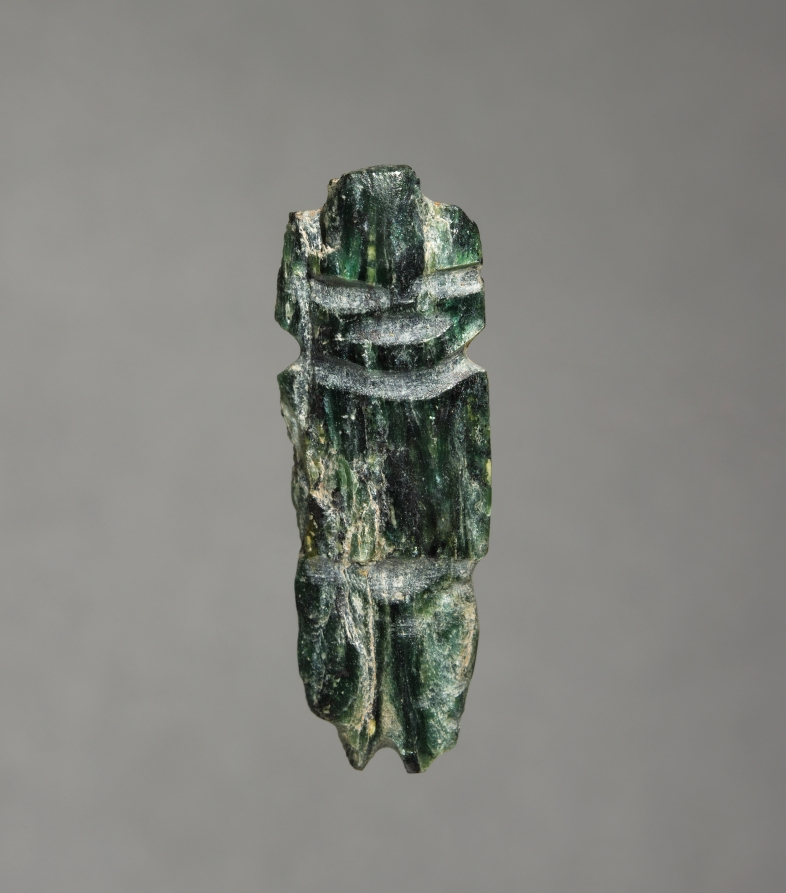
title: Miniature Figure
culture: Mesoamerica, Mexico, Guerrero, Mezcala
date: 100 BCE–300 CE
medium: serpentine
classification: Sculpture